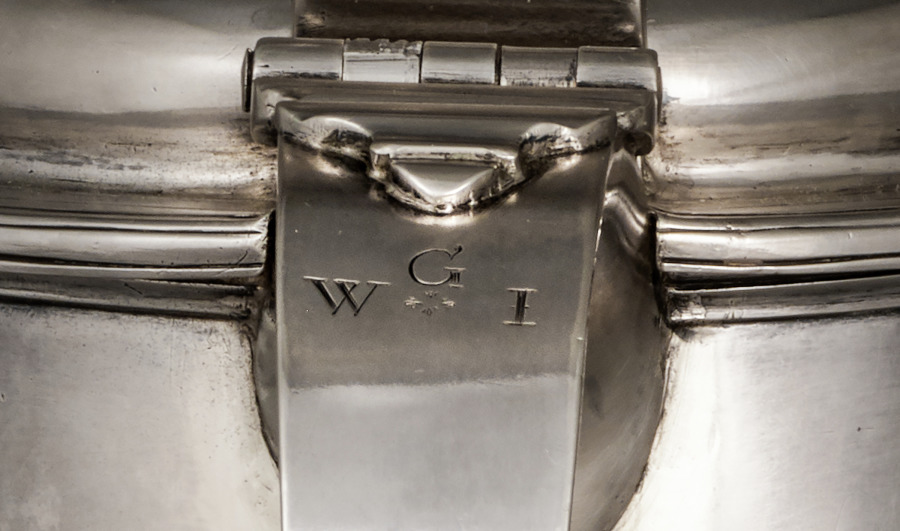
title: Tankard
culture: America, Rhode Island, Exeter and South Kingston, 18th century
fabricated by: Samuel Casey (American, c. 1724–c. 1780)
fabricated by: Thomas Arnold (American, 1734–1828)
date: c. 1750–1770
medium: silver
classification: Silver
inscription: engraved "G" over "W * I" in block letters on top of handle.